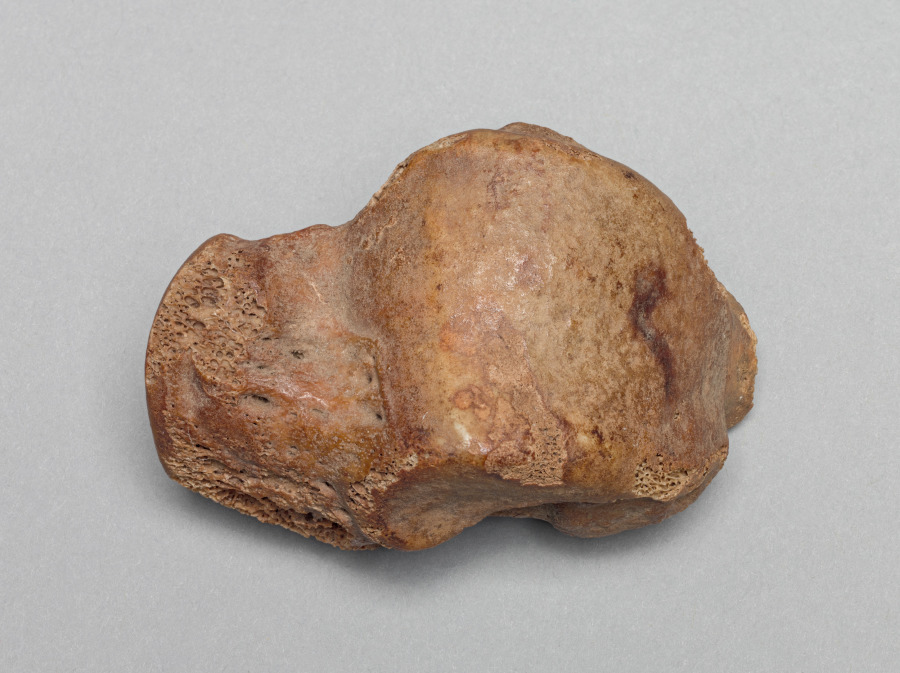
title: Relic of St. Januarius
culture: Germany, Lower Saxony?, Romanesque period, 11th century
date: c. 1045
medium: Bone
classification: Metalwork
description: This relic is housed in the portable altar commissioned by Countess Gertrude of Brunswick, which is one of the Guelph Treasure’s earliest and most sumptuous objects.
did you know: This bone is a nearly complete ankle joint (talus).